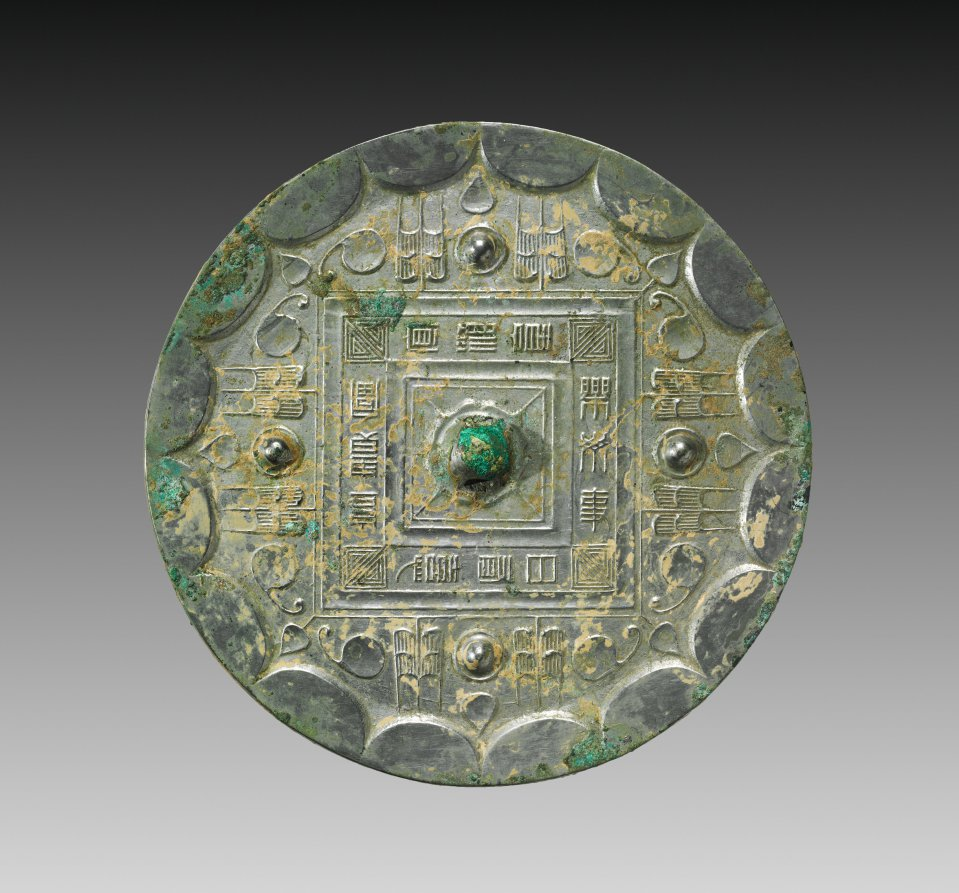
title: Mirror with a Square Band, Four Nipples, and Grass Leaf Motifs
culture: China, Western Han dynasty (206 BCE–8 CE)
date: 100s BCE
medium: bronze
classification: Metalwork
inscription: 長貴富，宜酒食，樂母事，日有熹。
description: Inscription: May you enjoy lasting fortune. May you enjoy wine and food. May you enjoy freedom from worry. May your days be replete with happiness.